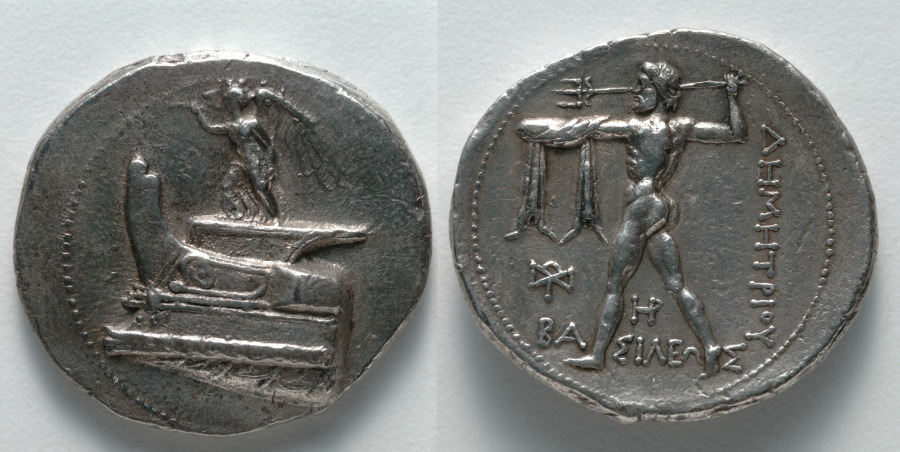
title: Tetradrachm: Nike on Ship's Prow (obverse); Poseidon (reverse)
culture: Greek, Macedonian, minted at Salamis (Cyprus), reign of Demetrios Poliorketes ("The Beseiger")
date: c. 300–295 BCE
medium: silver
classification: Coins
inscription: ΒΑΣΙΛΕΩΣ | ΔΗΜΗΤΡΙΟΥ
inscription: X perpendicular to Ρ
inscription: ΗΡ